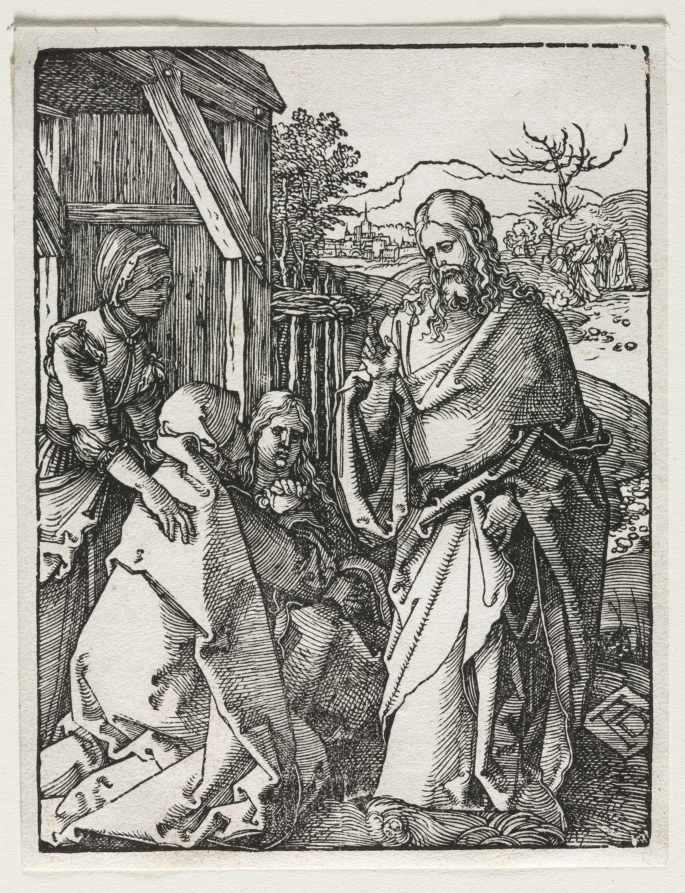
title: The Small Passion: Christ Taking Leave of the Virgin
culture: Germany, late 15th-early 16th century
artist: Albrecht Dürer (German, 1471–1528)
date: c. 1509–10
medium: woodcut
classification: Print